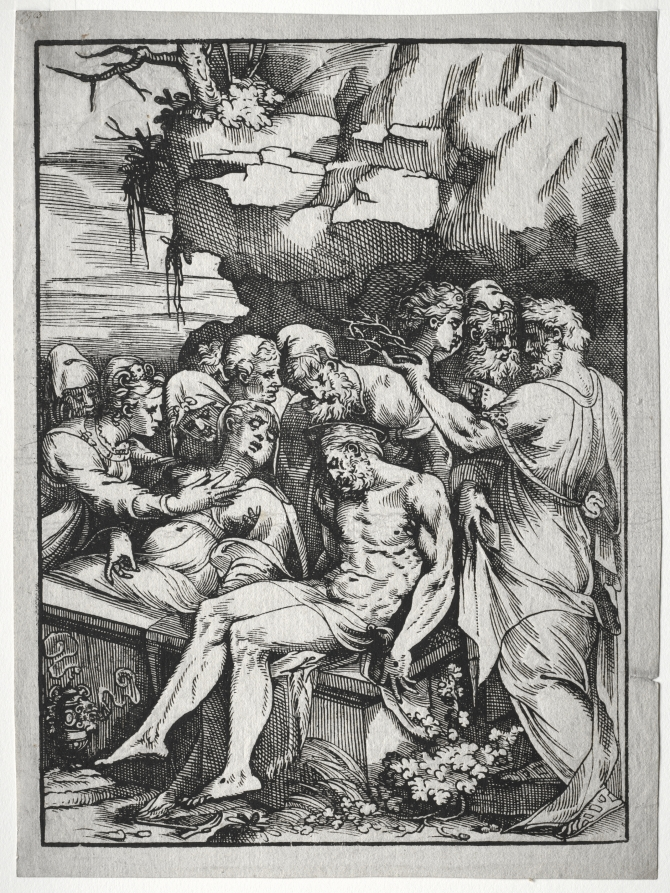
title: The Entombment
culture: Italy, 16th century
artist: Andrea Schiavone (Italian, c. 1500–1563)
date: c. 1550s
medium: woodcut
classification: Print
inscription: upper left, in pen and brown ink: GB ; VERSO, lower center, in graphite: Query? ; lower right, in graphite: 7[1?]6 3[circled] ; lower right, in graphite: w. 284(2) ;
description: This woodcut represents an episode after the Crucifixion when Christ's followers bring his corpse to the tomb. A cavernous backdrop draws attention to the figures in the foreground where the savior's body, displaying wounds on its hands and feet, become the focus of the viewer's devotion. At left, three women care for the motionless Virgin whose collapsed body mirrors that of her dead son. Two bearded disciples—Joseph of Arimathea and Nicodemus—attend to the body. One removes the crown of thorns from Christ's head. In its place, a thin halo appears in reference to Christ's imminent resurrection.